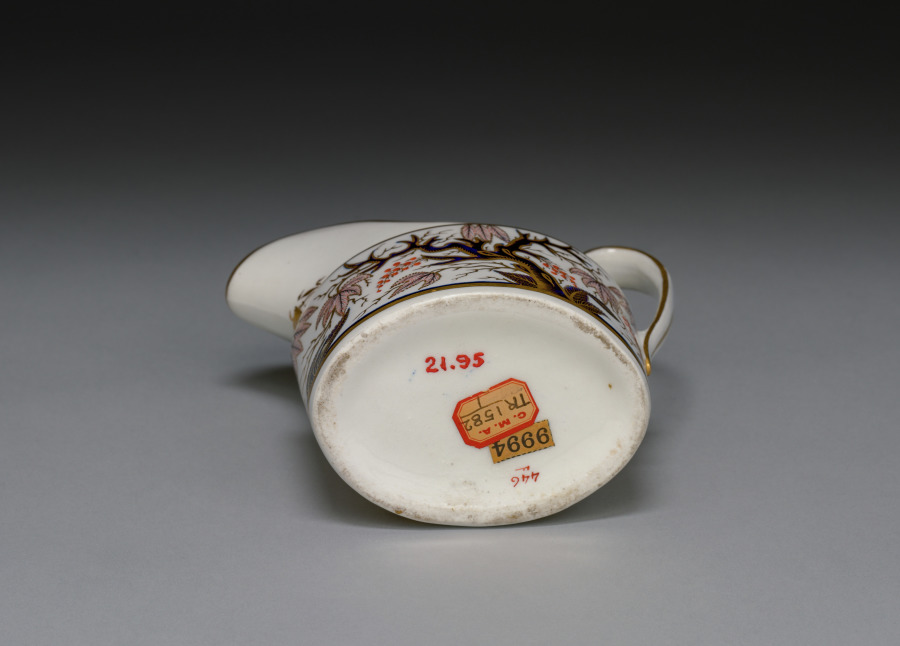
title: Cream Pitcher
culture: England, Staffordshire, late 18th Century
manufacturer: Spode Factory (British)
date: late 1700s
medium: ceramic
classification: Ceramic